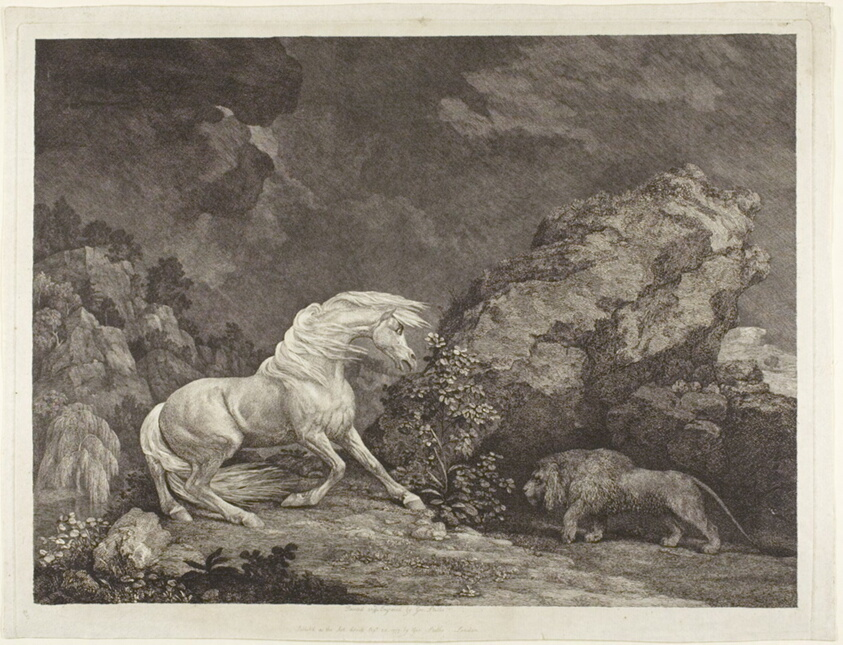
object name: Print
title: A Horse Frightened by a Lion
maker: George Stubbs (English, 1724-1806)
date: 1777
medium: Etching with engraving on paper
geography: England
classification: etching; print; prints and drawing